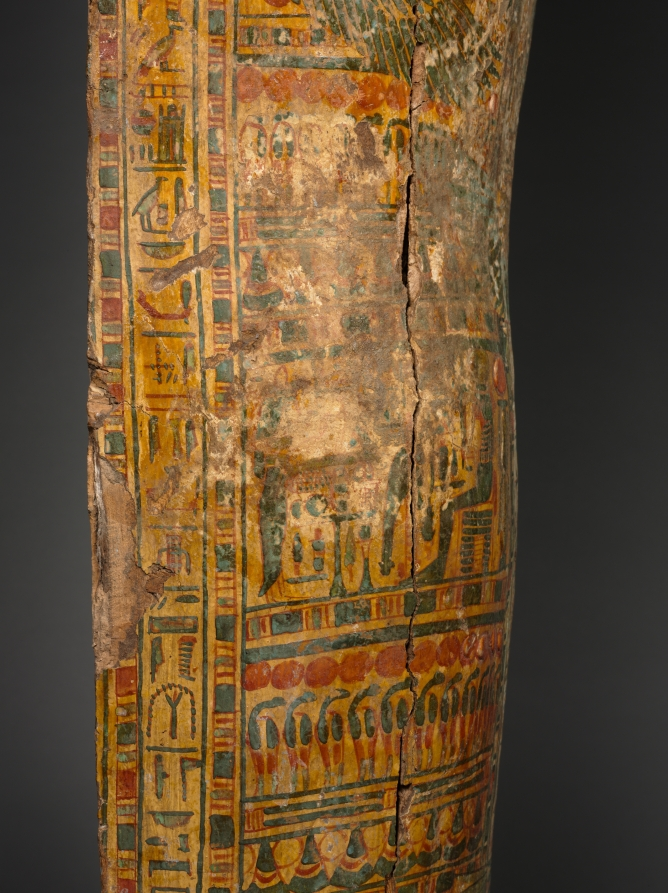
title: Coffin of Nesykhonsu (lid)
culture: Egypt, Third Intermediate (1069–715 BCE), Dynasties 21–22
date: c. 976–889 BCE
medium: gessoed and painted sycamore fig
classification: Funerary Equipment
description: A complete set of coffins during the late New Kingdom and Third Intermediate Period consisted of an outer and inner coffin and a mummy board (essentially a lid without a case, placed directly over the wrapped mummy). Judging by its size, this must have been Nesykhonsu's outer coffin. The type is essentially the same as the coffin of Bakenmut, which was also an outer coffin. The two coffins are said to have been found together and to have belonged to a man and wife. This is quite possible, although the inscriptions do not bear it out. Bakenmut is not mentioned on Nesykhonsu's coffin, nor is she mentioned on his. There was by this time a tremendous repertoire of scenes appropriate for coffin decoration. Whereas Bakenmut's coffin features images of deified dead pharaohs, Nesykhonsu's is decorated in a more personal way with scenes from her own funeral. The main scene in the interior (near the top) shows a priest clad in a panther skin with the mummy of Nesykhonsu behind. The god appears in mummy form and wears a sun disk on his head. The scarab beetle inside the sun disk identifies him as Khepri, the morning sun, and the hieroglyphs to the right identify him as Atum, the evening sun. Taken together, image and text represent the sun god in both his rising and setting, youthful and aged aspects.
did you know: Two of Nesykhonsu's titles, "Lady of the House" and "Singer of the Choir of Mut the Great," are written on the outside of the coffin.